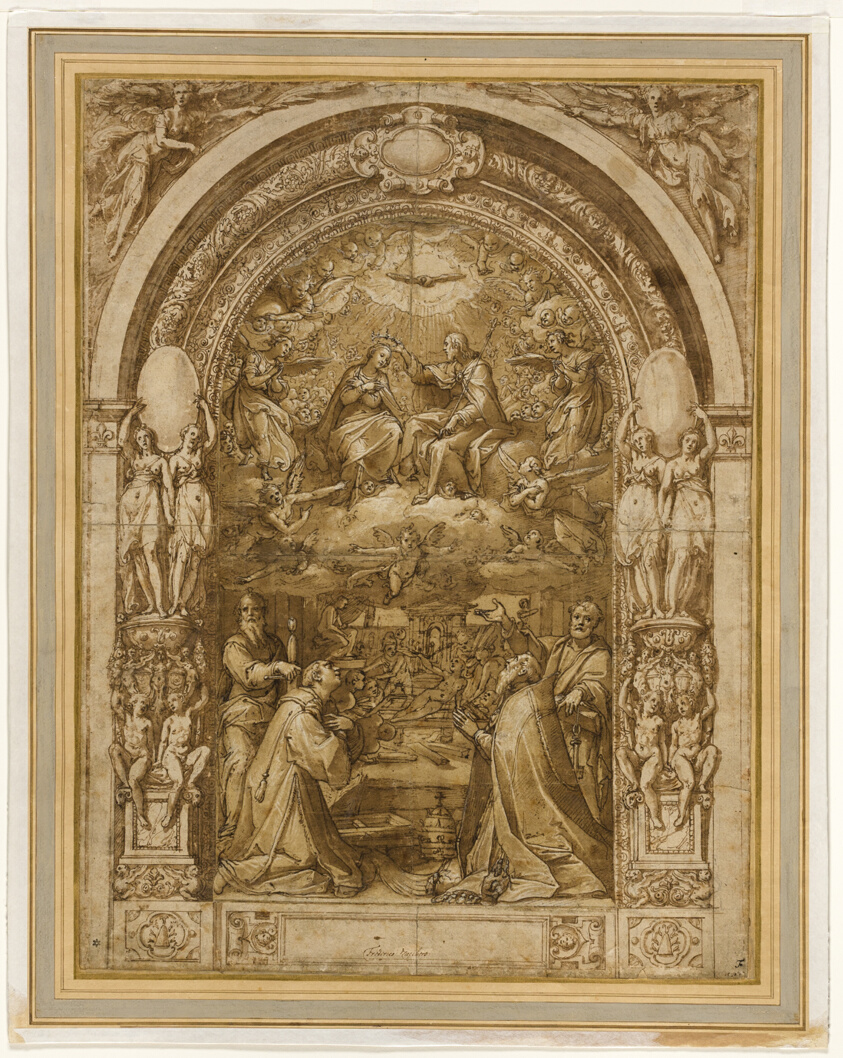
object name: Drawing and Watercolor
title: Coronation of the Virgin, with the Martyrdom of Saint Lawrence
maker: Federico Zuccaro (Italian, c.1542-1609)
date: c. 1570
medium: Pen and brown ink with brush and brown wash, heightened with lead-white gouache (partially oxidized), over touches of black chalk, on cream laid paper, pieced and laid down on ivory card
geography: Italy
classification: pen and ink drawings; drawings (visual works); prints and drawing